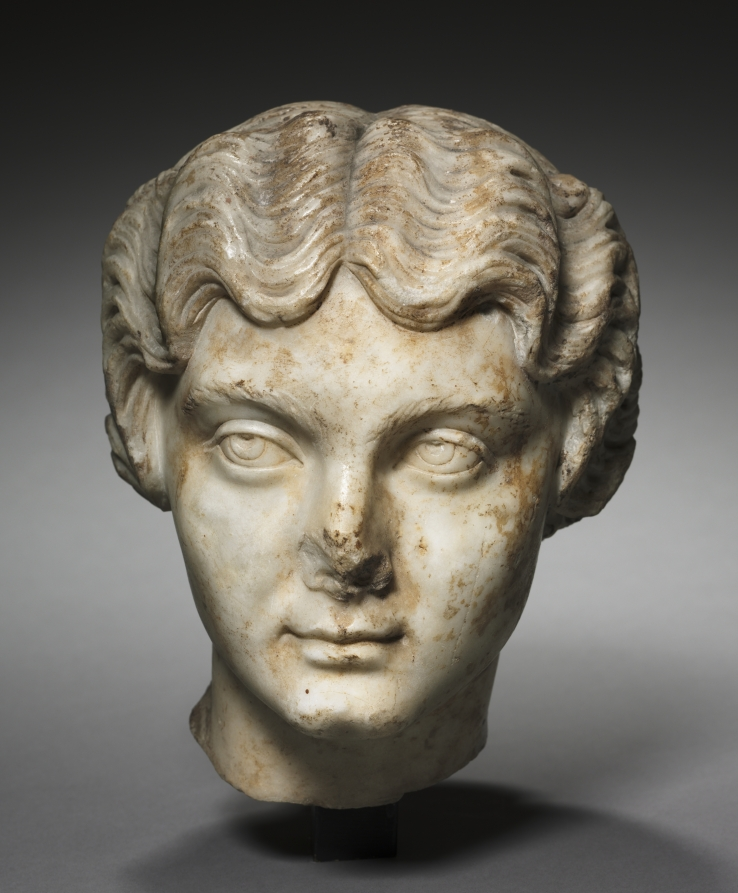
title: Portrait Head of a Woman, Probably the Empress Faustina Minor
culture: Italy, Roman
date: c. 165 CE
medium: marble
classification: Sculpture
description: Acquired in 1925, this head was initially identified as a portrait of the Empress Lucilla (lived AD 149-182), wife of the Emperor Lucius Verus, who co-ruled with Marcus Aurelius from AD 161-169. More recently, scholars have identified the portrait as a representation of the Empress Faustina Minor (lived c. AD 130-176/177), wife of Marcus Aurelius (r. 161-180) and mother of Lucilla. The two women, relatively close in age, share a number of portrait features: heavy-lidded eyes, with incised irises and pupils; small mouth; and a distinctive hairstyle, parted in the center and pulled back in waves to a braided knot at the base of the neck.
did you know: Scholars have disagreed about this portrait's identity—probably an empress, either Faustina Minor or Lucilla.